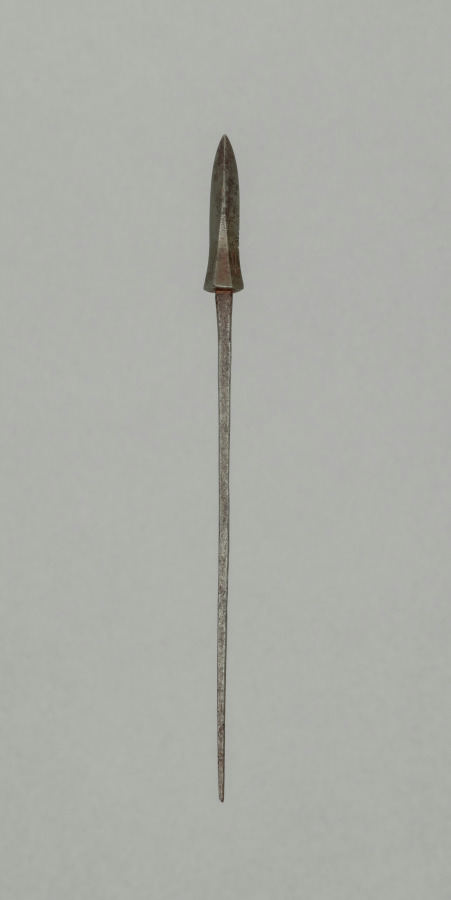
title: Arrow Point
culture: Japan, Edo period (1615–1868)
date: 1700s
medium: steel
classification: Arms and Armor